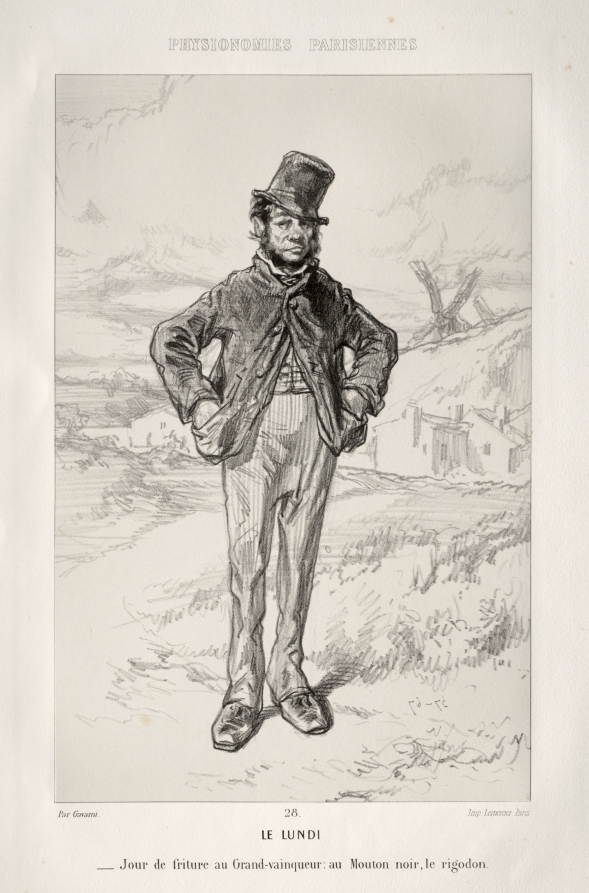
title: Le Lundi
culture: France, 19th century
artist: Paul Gavarni (French, 1804–1866)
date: c. 1857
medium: lithograph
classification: Print